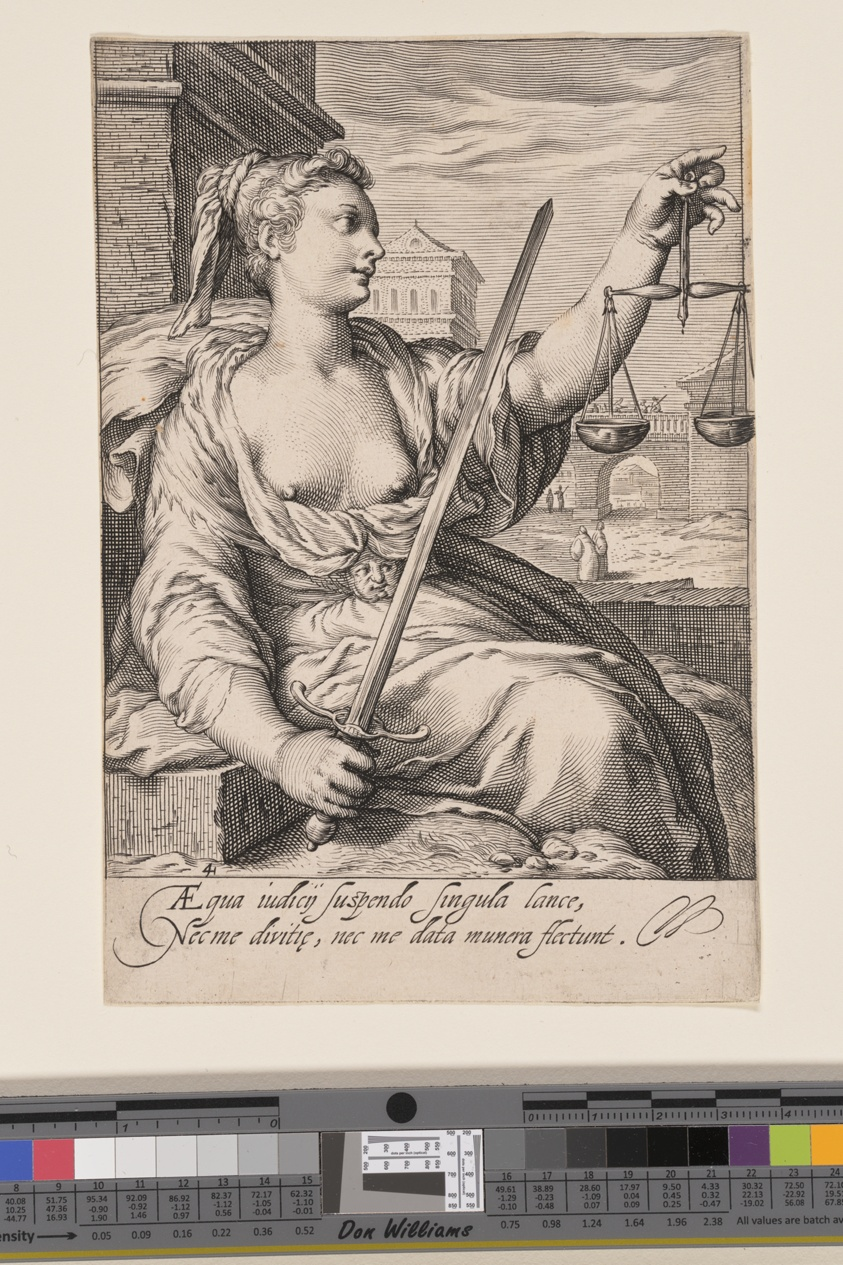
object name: Print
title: Justice, from The Seven Virtues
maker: Jacob Matham (Dutch, 1571–1631); after Hendrick Goltzius (Dutch, 1558–1617)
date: 1597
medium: Engraving on paper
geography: Netherlands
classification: engraving; paper; print; prints and drawing